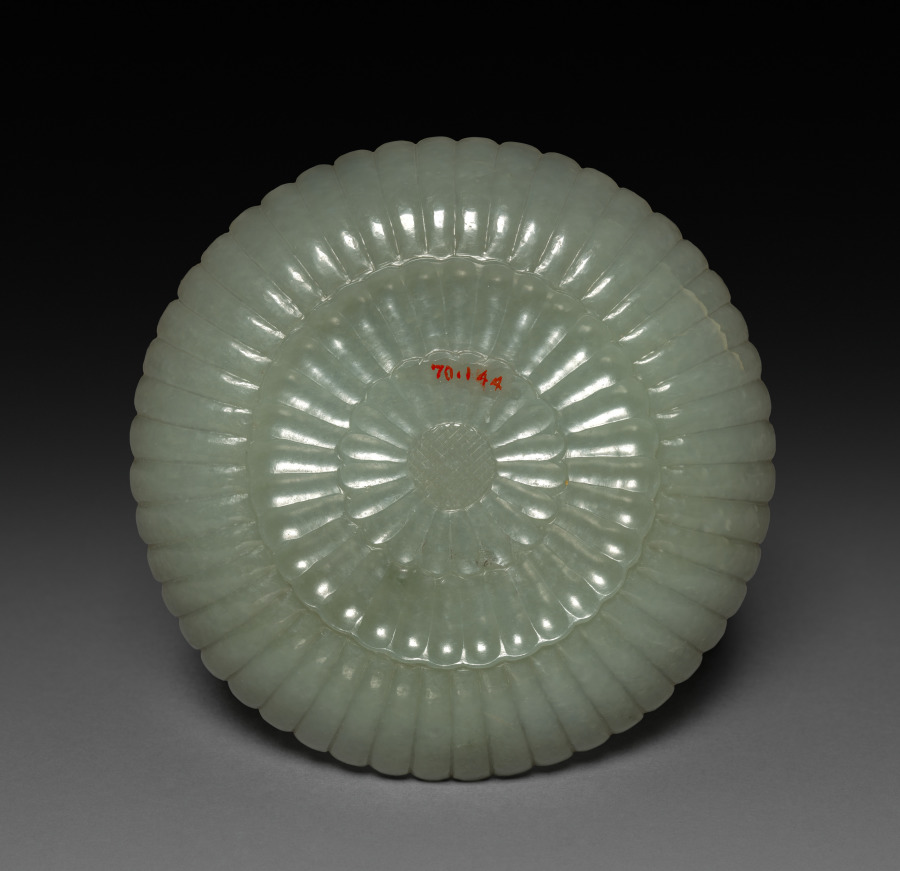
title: Plate in the Form of a Chrysanthemum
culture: China, Qing dynasty (1644-1911)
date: 1700s–1800s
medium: jade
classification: Jade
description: This light gray-green jade plate is carved on both sides into the shape of an open chrysanthemum. There are three tiers of concave petals and a central rondel of cross-hatched lines to indicate the pistils.